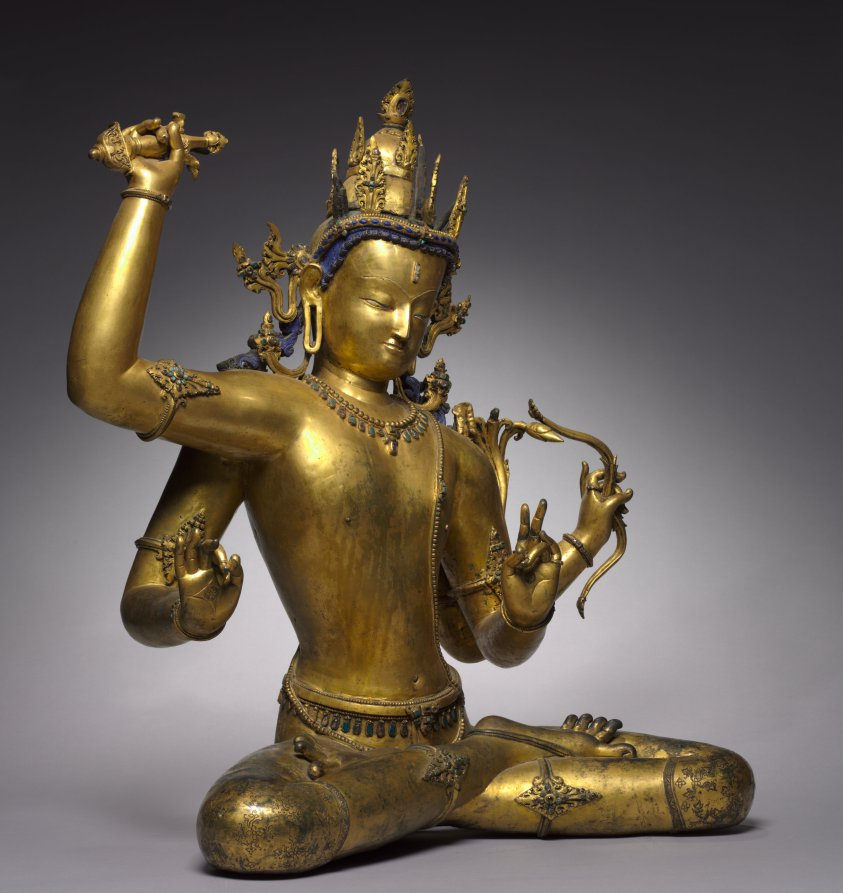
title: Bodhisattva of Wisdom (Manjushri)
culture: Nepal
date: 1400s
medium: Gilt bronze with precious and semiprecious stones, gum tempera, and cold gold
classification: Sculpture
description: This image depicts one of the main bodhisattvas, beings only one stage away from full enlightenment. Because the historical Buddha was a prince prior to his renunciation and life as a wandering ascetic, bodhisattvas are depicted as royal princes. This example has the sharp features, sweet expression, and crisp details characteristic of images made in Nepal during the 1400s. In his upraised right hand Manjushri holds the hilt of a sword that, like wisdom itself, metaphorically cuts through and defeats ignorance. His lower, rear left hand grasps a bow, once probably strung with a wire. Also missing is the arrow that he likely held in his lowered right hand. Arrows were often symbols for mantras, or strings of syllables thought to have the power to focus the mind and work like missiles to destroy negativity and affliction. The gesture of his lowered left hand indicates the transmission of Buddhist teachings. The lotus stem that rises at the left elbows originally held a book of sutras. This figure is in the yogic posture of meditation with the big toe flexed in concentration. Yoga is of central importance in tantric Buddhism, because high-level practitioners are able to discipline the body to such an extent that the mind can also be controlled.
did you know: The bodhisattva's short breeches are patterned in spiraling floral forms incised into the metal.